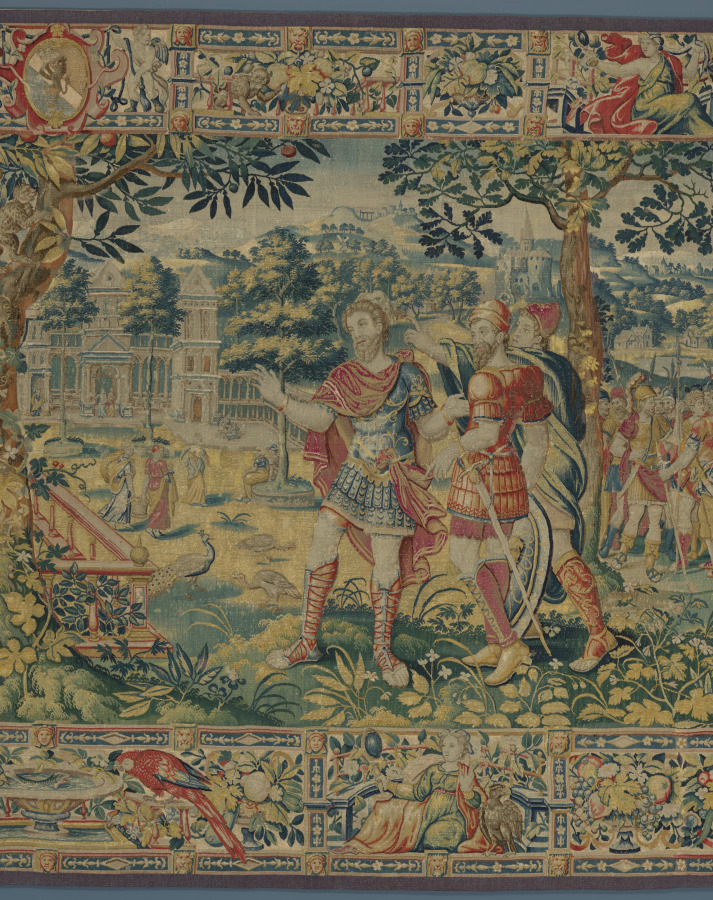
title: Romans Admiring the Sabine Women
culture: Belgium, Brussels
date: 1570–90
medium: silk and wool: tapestry weave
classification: Tapestry